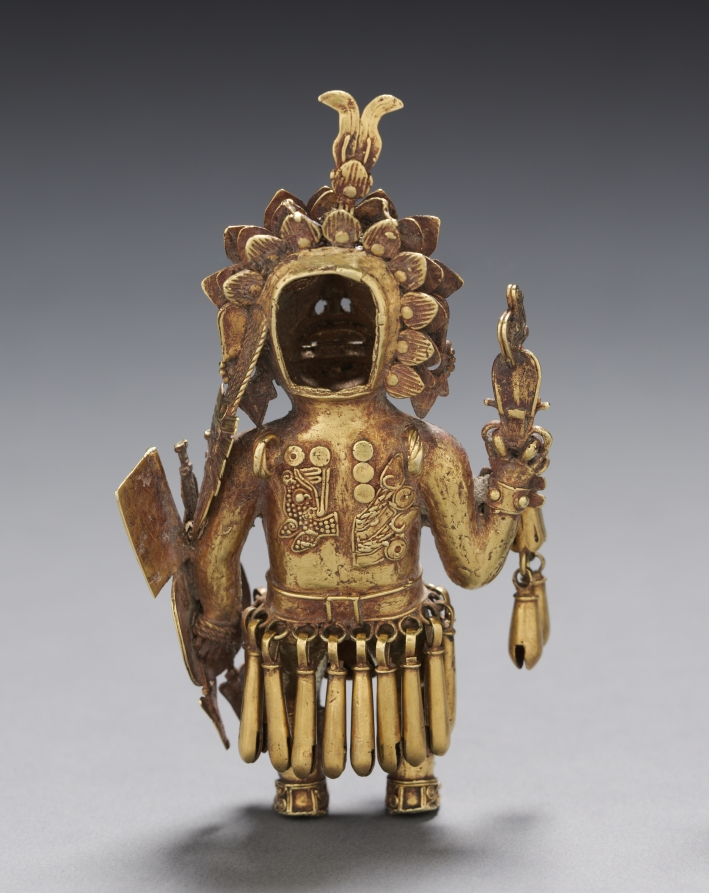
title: Figure of a Warrior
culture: Central Mexico, Tetzcoco?, Aztec, Post-Classic Period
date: after 1325 (thermoluminescence date of casting core, 1345–1575)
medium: gold-silver-copper alloy (cast)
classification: Metalwork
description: The elite status of this warrior, who holds a dartthrower, darts, and a shield, is revealed by the gold from which he is made as well as his jewelry and sandals. Military accomplishment was prized by the Aztecs, whose imperial expansion was fueled by ambition as well as their belief that they were chosen to uphold cosmic order through war. The purpose of the chest cavity is unclear; the figurine may have been worn as a pendant.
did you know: The calendar glyphs on the figure's back read "2 Rabbit, 3 Water."